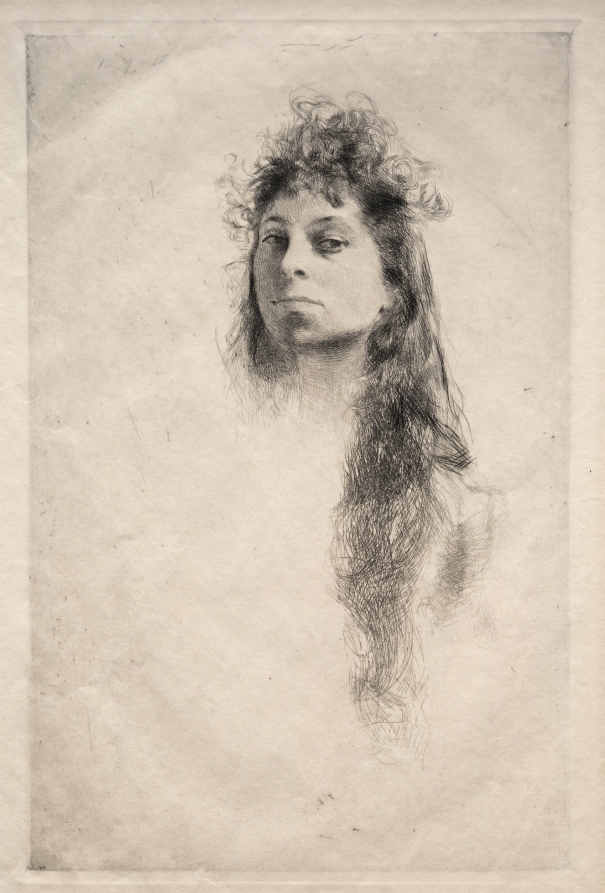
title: Head of a Girl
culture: America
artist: Robert Frederick Blum (American, 1857–1903)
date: 1800s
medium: etching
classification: Print